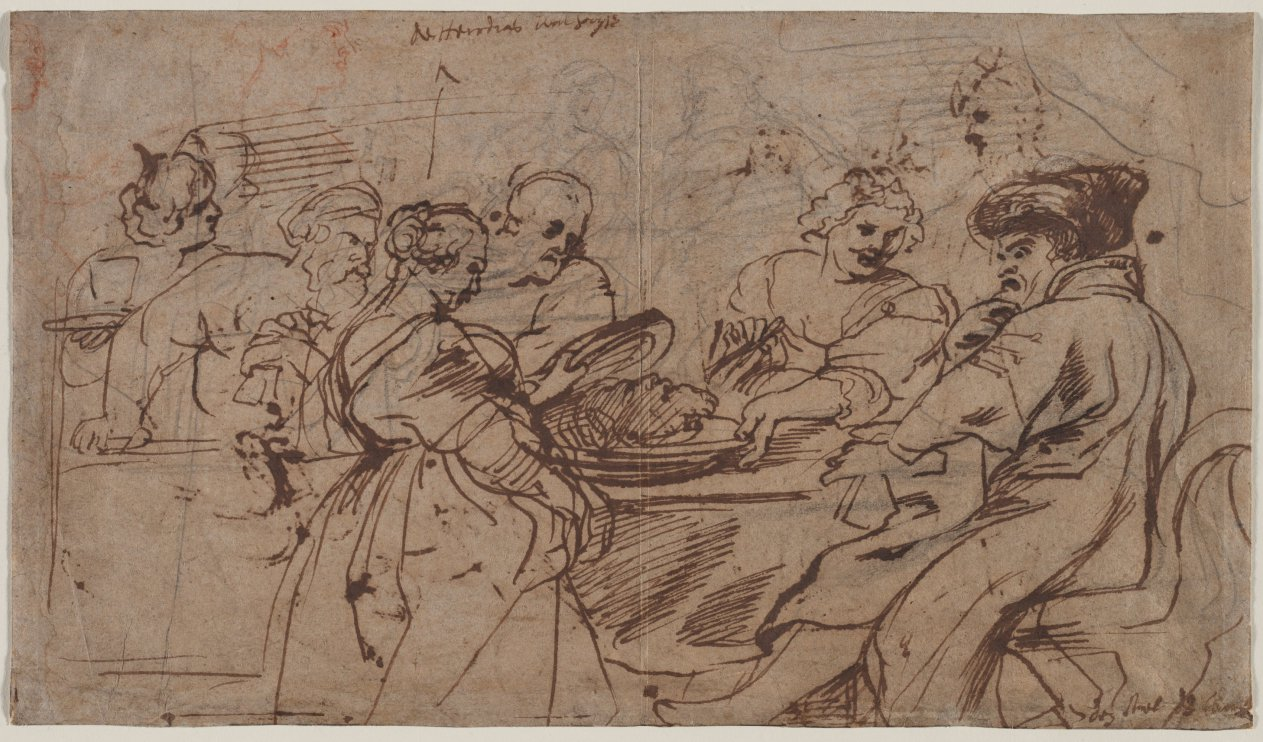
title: The Feast of Herod (recto)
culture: Flanders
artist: Peter Paul Rubens (Flemish, 1577–1640)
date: c. 1637–38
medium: pen and brown ink, with black and red chalk, touched with white gouache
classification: Drawing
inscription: by artist, upper center, in brown ink: de Herodias [wat hooger? (or: "meden hoofte," "wat hoegte," or "wat hogher")]; by artist, lower right, in brown ink: den[or: deze] stoel te [cort?].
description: Peter Paul Rubens had a large studio in Antwerp and used drawing to prepare for large paintings as well as to direct the many pupils who assisted him. Striking in its immediacy, the drawing on the recto of this sheet of paper is a preparatory study for the Feast of Herod painting now at the Scottish National Gallery in Edinburgh. Herod, wearing a large cap and wrapped in a mantle, shrinks back in horror as Salome uncovers a charger that holds the head of Saint John the Baptist. Smiling, Herodias grabs the platter with her left hand and, in a chilling detail, gestures toward the charger with a fork. Rubens wrote what is usually interpreted as “Herodias somewhat higher” at the top of the sheet. The verso of the sheet depicts a sketch for another story featuring a change of fortune at the hands of a vengeful woman, Tomyris with the Head of Cyrus. Rubens made two paintings of the subject (now in Paris and Boston). A rare theme, the story tells of Queen Tomyris who, avenging the death of her son in battle, collects the head of his murderer Cyrus in a bag of human blood. Tomyris is shown seated under a canopy holding a scepter, while the servants before her handle Cyrus’s head. Rubens wrote “plus spatij” (more space) in the center of the sheet.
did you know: The two stories that Rubens depicted on the front and back of this sheet of paper each feature a gruesome death, the result of revenge at the hands of a powerful woman.